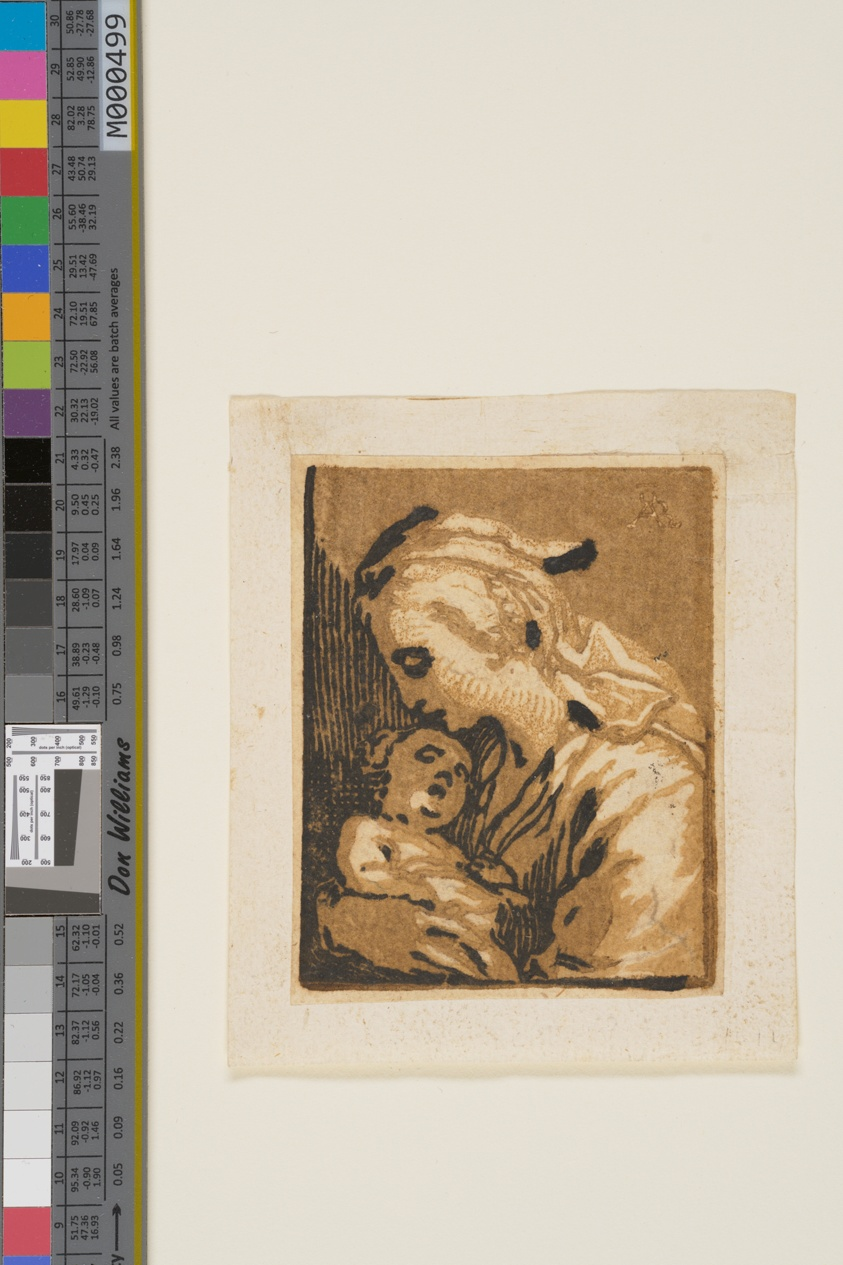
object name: Print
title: The Madonna and Child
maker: Attributed to Ludolph Büsinck (German, c. 1590-after 1643); after Abraham Bloemaert (Dutch, 1566–1651)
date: c. 1620-23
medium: Chiaroscuro woodcut from three blocks on ivory laid paper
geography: Netherlands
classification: print; paper; prints and drawing; chiaroscuro woodcut